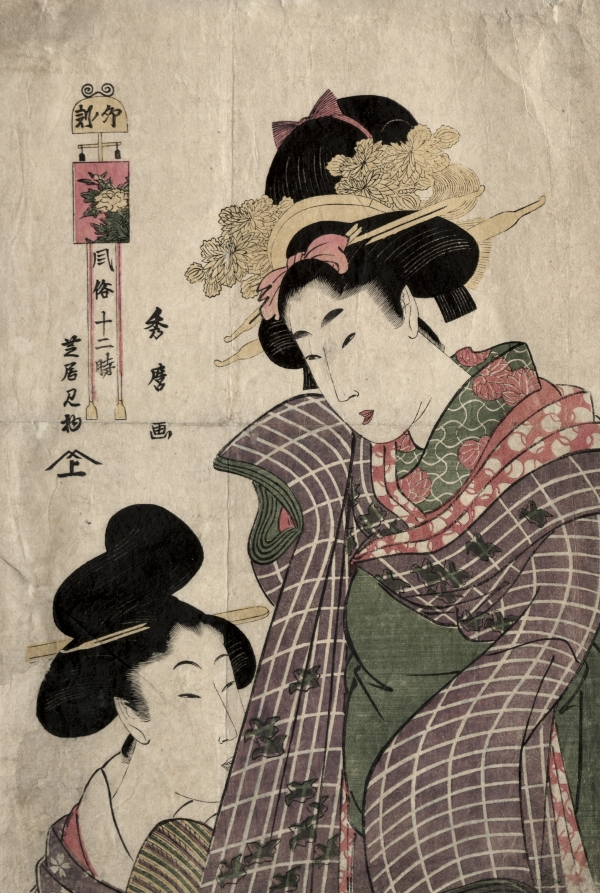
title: Going to the Kabuki Theater in the Hour of the Hare (From the Series The Twelve Hours with Daily Events)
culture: Japan, Edo period (1615–1868)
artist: Kitagawa Hidemaro (Japanese)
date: early 1800s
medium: color woodblock print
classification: Print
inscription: Signature: Hidemaro ga